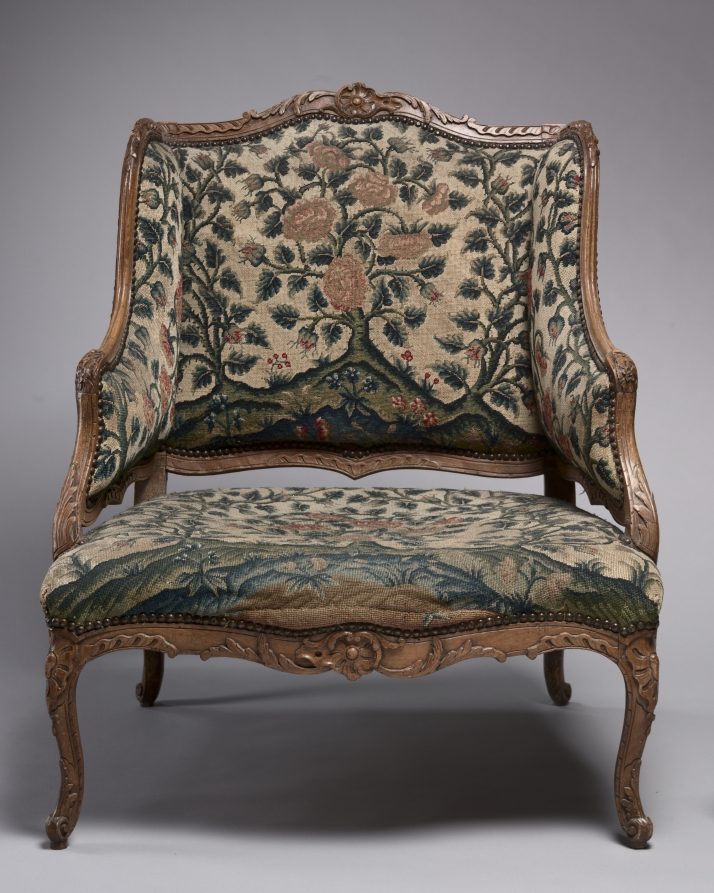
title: Daybed Armchair (Duchesse brisée)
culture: France, style of Louis XV, 20th century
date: c. 1890–1940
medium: carved wood frame upholstered in needlework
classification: Furniture and woodwork